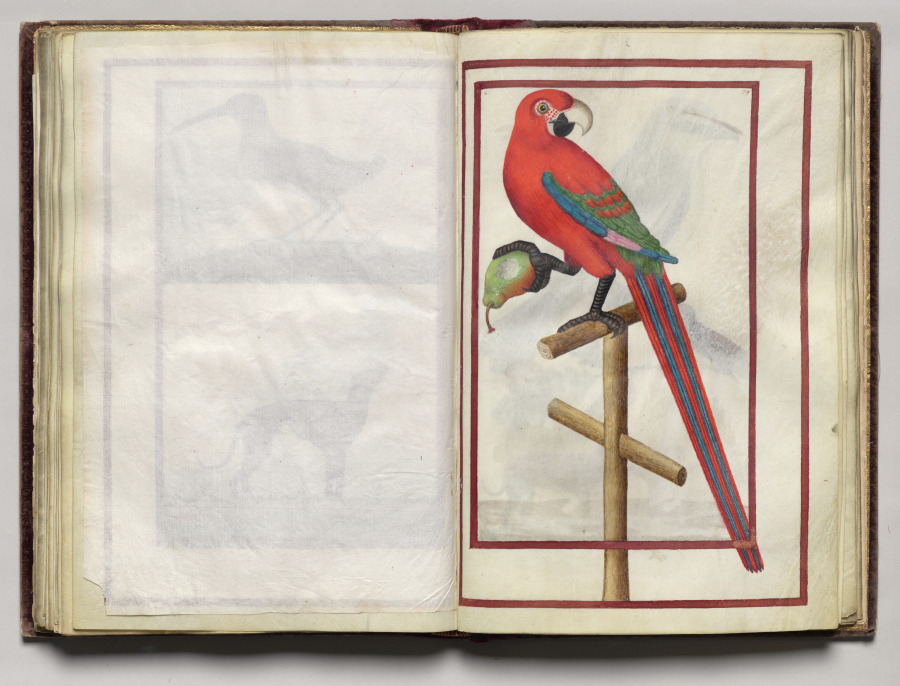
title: Parrot with a Pear, folio 38 (recto), from Florilegium (A Book of Flower Studies)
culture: France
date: 1608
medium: watercolor, ink, silver, and gold over occasional traces of pencil, on vellum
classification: Bound Volume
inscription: Dated: Poitiers 1608 (on frontispiece) Signed: On frontispiece in black ink, lower right: Van Kuyk Notation on drawing: Frontispiece: in pencil, lower margin: * élève de Van Kessel, peintre flammand (* in pencil also appears in front of Van Kuyk's name).